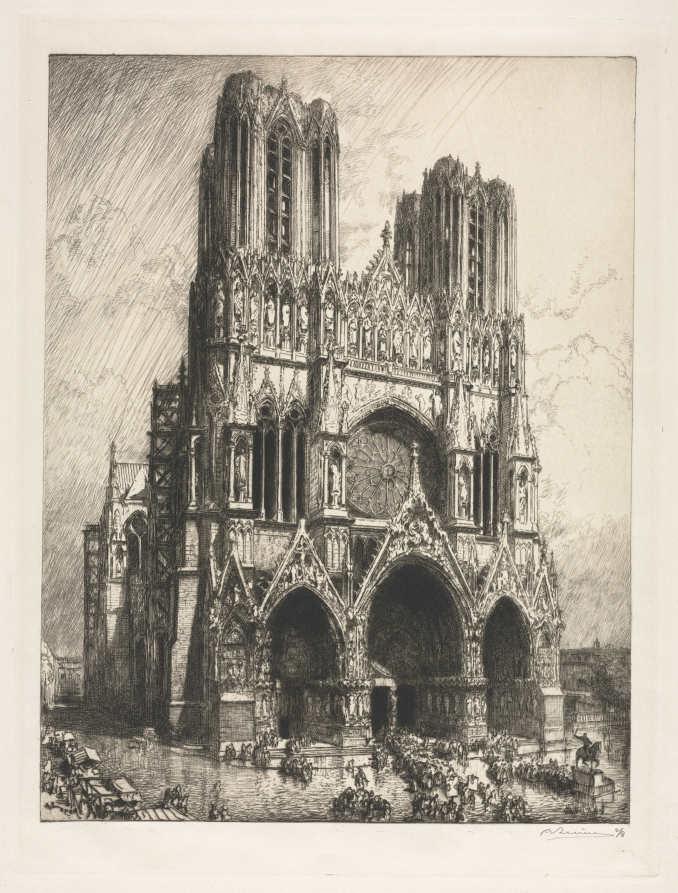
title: Reims Cathedral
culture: France, 19th-20th century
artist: Auguste Louis Lepère (French, 1849–1918)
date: 1911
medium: etching and drypoint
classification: Print